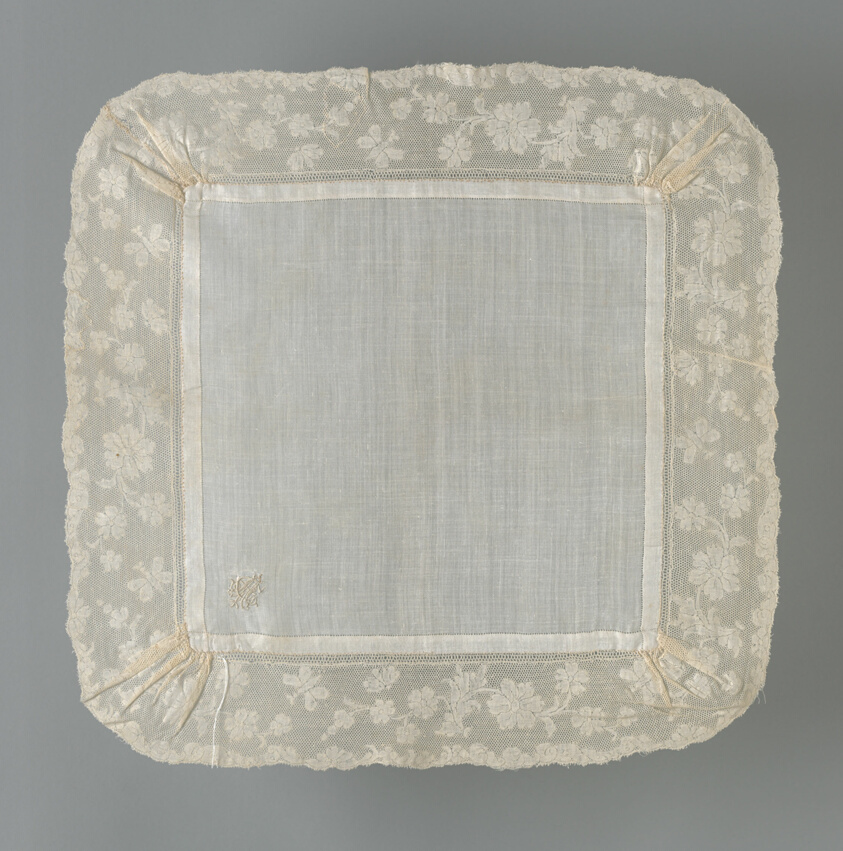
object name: Textile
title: Handkerchief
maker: France, Valenciennes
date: 1760s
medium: Linen, plain weave; embroidered with cotton and linen in antique hem, back, padded overcast, and padded satin stitches; edged with cotton, bobbin-made tape and linen, bobbin straight lace of a type known as "Valenciennes"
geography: Valenciennes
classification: textile; needlework (visual works); accessories (object genre); weaving